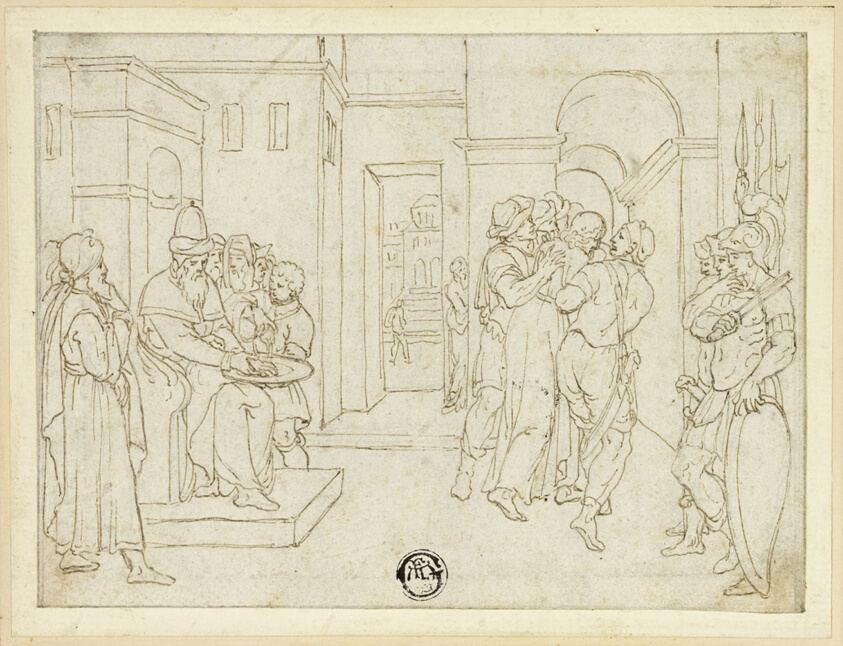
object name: Drawing and Watercolor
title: Pilate Washing His Hands, with Christ Being Led Away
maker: After Giovanni de Boulogne, called Giambologna (Italian, 1529-1608); or Style of Bernardo Castello (Italian, 1557-1629)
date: 1575-1599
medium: Pen and brown ink, over traces of black chalk, on gray laid paper, edge mounted to buff wove paper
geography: Italy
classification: pen and ink drawings; drawings (visual works); prints and drawing